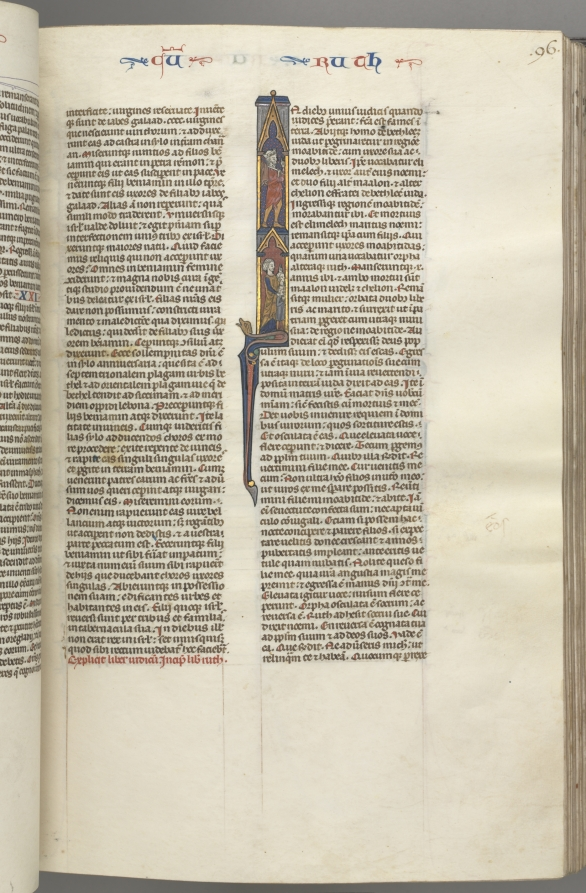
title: Fol. 96r, Ruth, Historiated Initial I with Elimilech and Naomi.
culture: Southern France, Toulouse(?), 13th century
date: c. 1275–1300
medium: ink, tempera and gold on vellum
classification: Bound Volume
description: Biblical manuscripts were highly prized and important possessions of churches, monasteries, cathedral schools, and universities throughout medieval Europe. The biblical texts were known as the vulgate, the translations made by Saint Jerome in the fourth century from Hebrew and Greek into Latin, which became the definitive and official Latin version of the Roman Church. In the 13th century, the bible was, for the first time, produced as a single volume with an officially sanctioned sequence to its books and chapters as illustrated by this example. The very extensive decoration of this bible is arranged hierarchically to indicate the relative importance of the various texts so that full or almost full-page initials mark the openings of the first prologue, Genesis, and the first Gospel; historiated initials mark the beginning of each book and illuminated initials mark the Prologues.